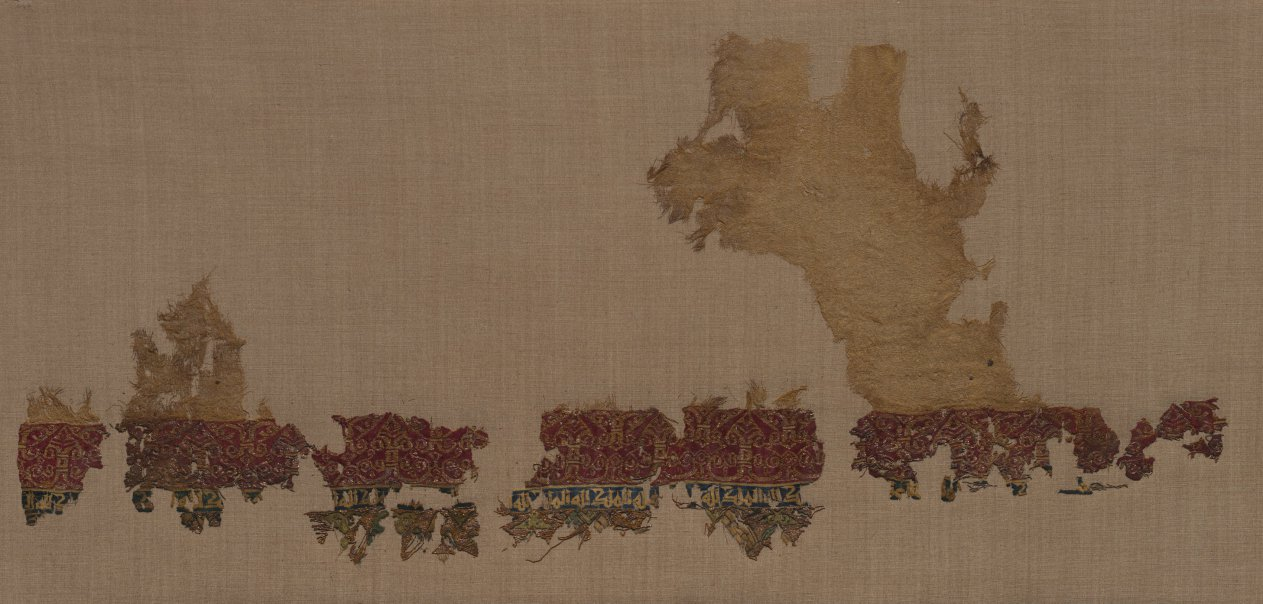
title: Tiraz with gold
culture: Egypt, Fatimid period, reign of Caliph al-Hakim, 1013–1020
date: 1013–1020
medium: plain weave with inwoven tapestry weave: linen, silk, and gold filé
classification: Textile